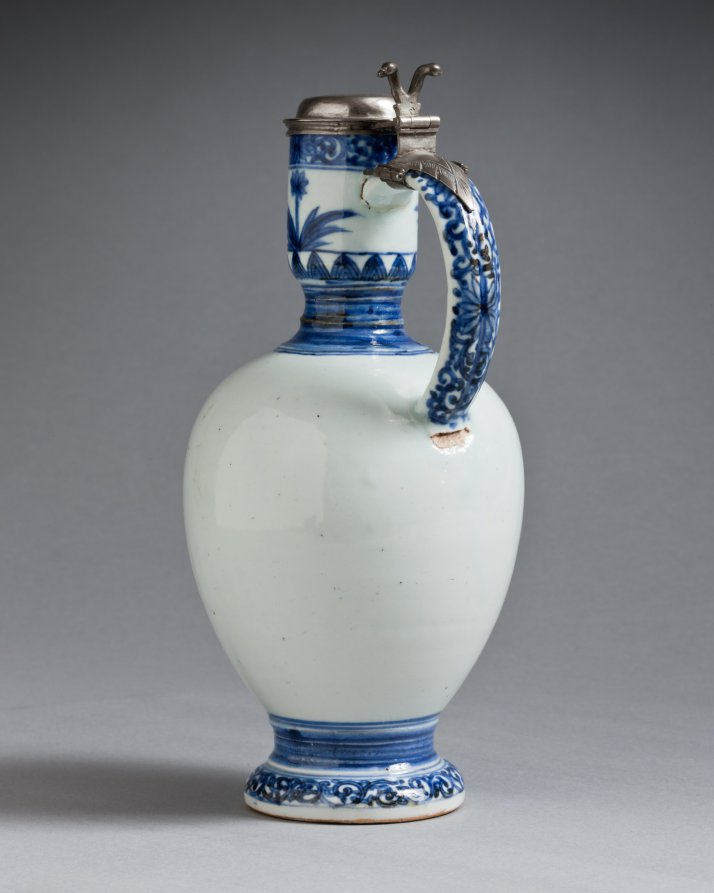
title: Jug with Silver Mounts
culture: Japan, Edo period (1615–1868)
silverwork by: Barent van Leeuwen (Dutch, 1637–1682)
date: c. 1662–76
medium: porcelain with underglaze blue decoration and silver mounts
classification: Ceramic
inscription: [on silver]: town mark for Amsterdam; lion rampant crowned (alloy mark for 0-934 silver); d (date letter for 1666), maker's mark of Barent van Leeuwen.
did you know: The coat of arms on this jug are those of the Valckenier family, active in the Dutch East India Company.